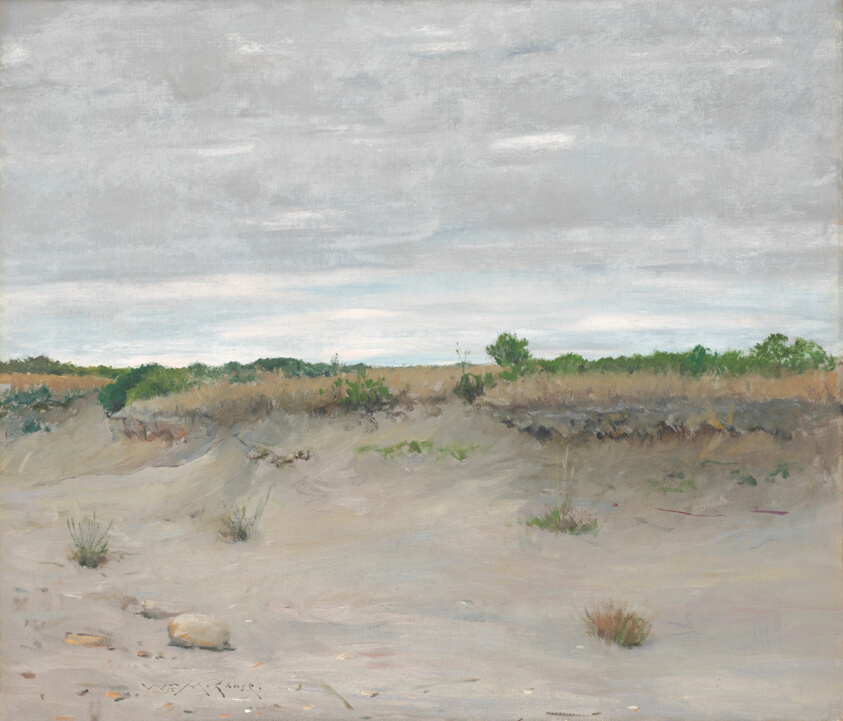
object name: Painting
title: Wind-Swept Sands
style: Impressionism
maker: William Merritt Chase (American, 1849–1916)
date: 1894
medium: Oil on canvas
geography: Long Island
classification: painting; american arts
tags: landscapes